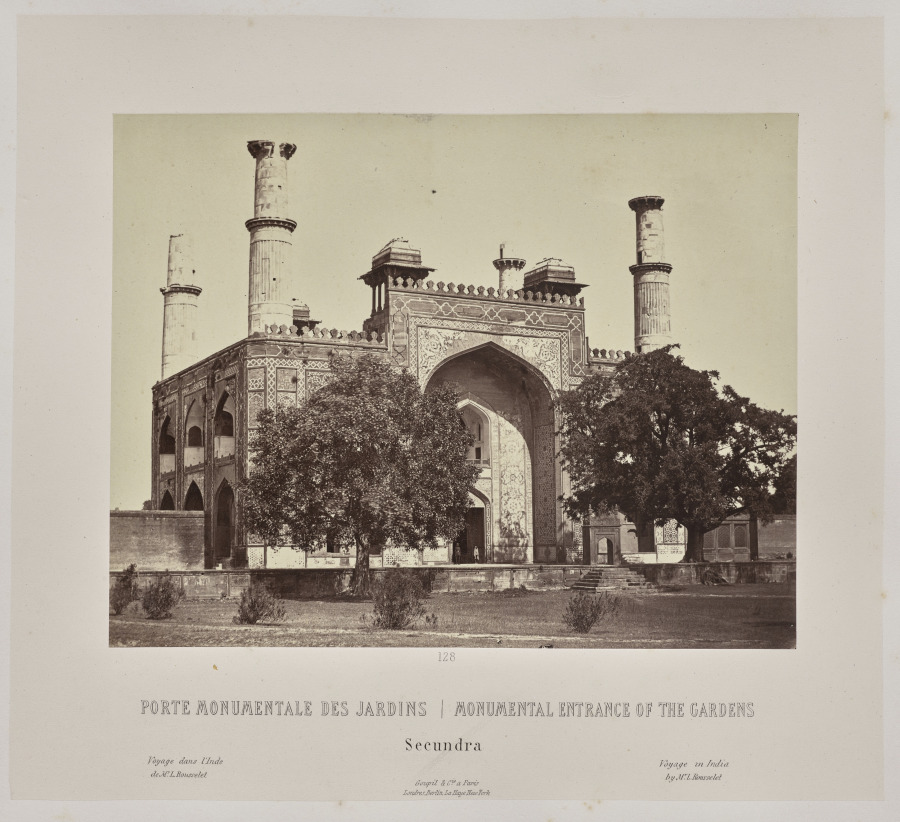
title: Monumental Entrance of the Gardens, Secundra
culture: France, 19th century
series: India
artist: Louis-Théophile Marie Rousselet (French, 1845–1929)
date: 1865–68, published 1869–70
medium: Albumen print from glass plate negative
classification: Photograph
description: Concerned that his drawings did not do justice to the splendor of India’s monuments, Rousselet learned photography in India that year, a remarkable accomplishment. He proved to be a talented photographer with a sophisticated sense of composition. The scenes in this volume sweep across sites of Sultanate, Rajput, and Mughal power in northern India, from the sacred Hindu city of Varanasi on the Ganges River to Alwar in Rajasthan. Also included are several scenes of industry and portraits of Indian rulers.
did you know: Louis Rousselet described himself as a “scientific traveler” when he went to India alone at age 18 in 1863 and stayed into 1868.